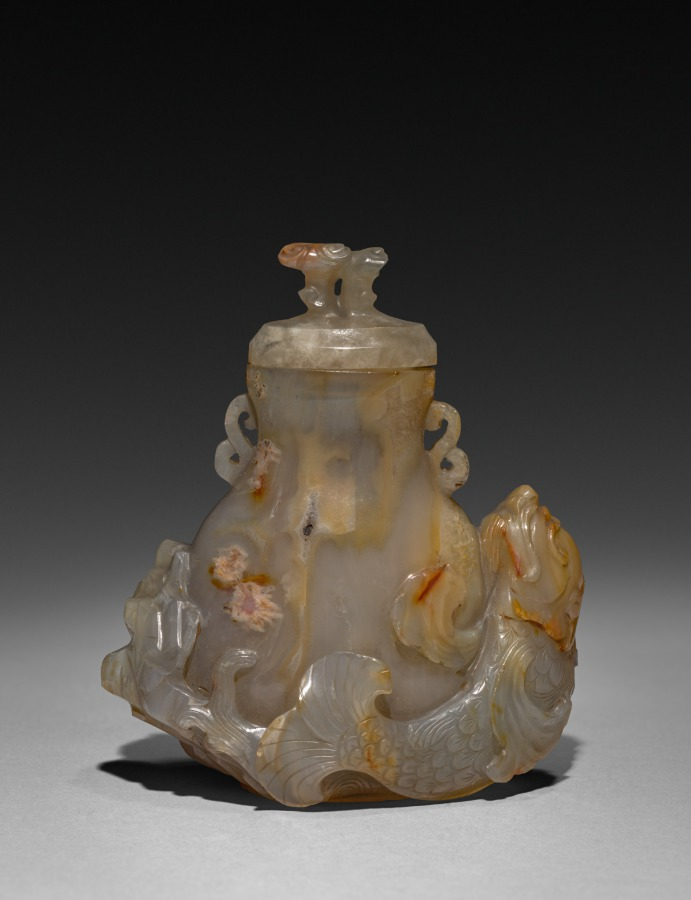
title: Vase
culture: China, Qing dynasty (1644-1911)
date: 1644–1911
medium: glass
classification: Glass